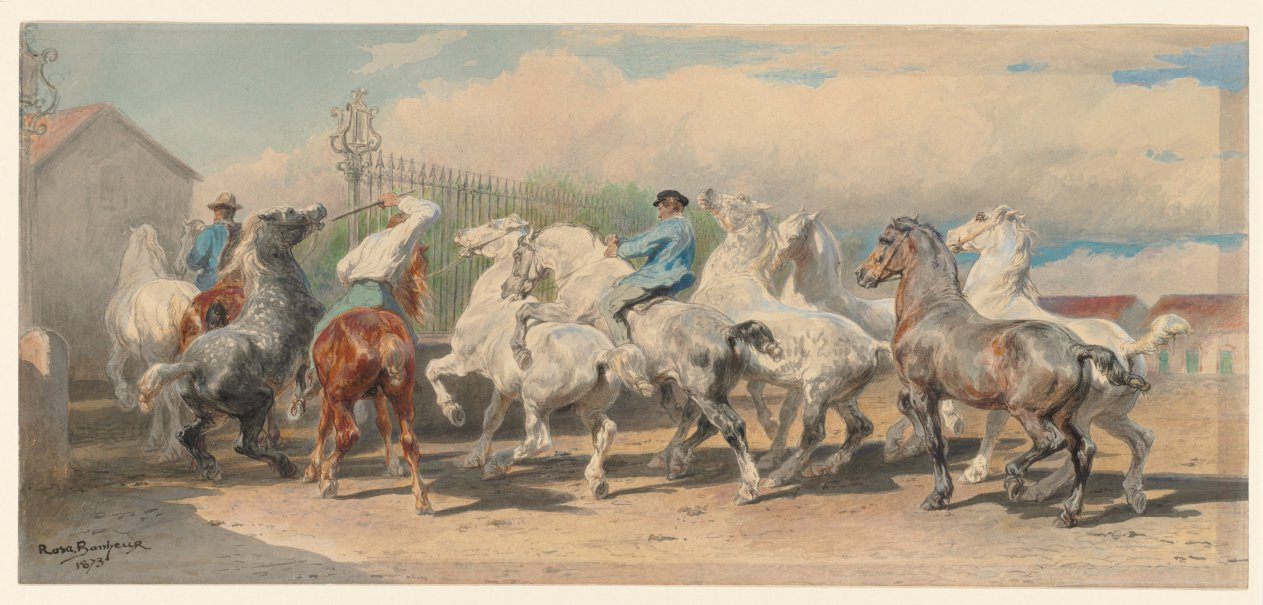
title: Return from the Horse Fair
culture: France, 19th century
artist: Rosa Bonheur (French, 1822–1899)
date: 1873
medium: watercolor and gouache over graphite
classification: Drawing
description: Rosa Bonheur was the first woman artist to receive the Cross of the French Legion of Honor, a French civilian and military decoration. She achieved great official and commercial success, especially for her carefully finished and naturalistic paintings of animals. This watercolor displays Bonheur's technical mastery and her close study of anatomy, as well as her appreciation for the natural beauty of the horses. The animals are arranged in a shallow frieze across the long composition, and their manicured tails, along with the riders' costumes and the finely-wrought iron fence, identify them as stock from the historic national breeding stables.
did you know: This drawing is one of numerous sheets relating to a large-scale painting now in the collection of the Metropolitan Museum of Art.